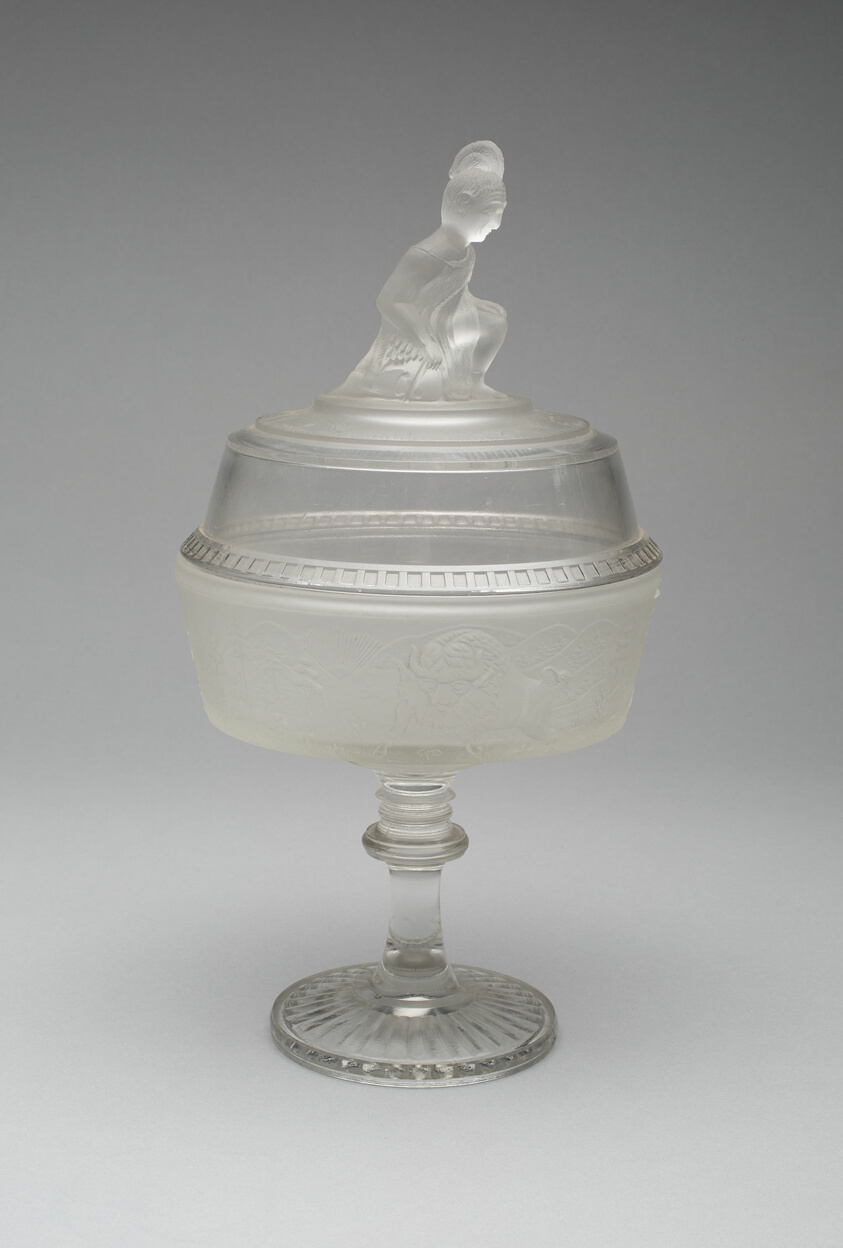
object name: Glass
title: "Westward Ho!/Pioneer" pattern covered compote on pedestal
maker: Gillinder and Sons, 1861–c. 1930; Philadelphia or Greenbsburg, Pennsylvania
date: c. 1876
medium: Glass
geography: Philadelphia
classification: compote; glass; vessel for serving food; american decorative arts; american arts; decorative arts